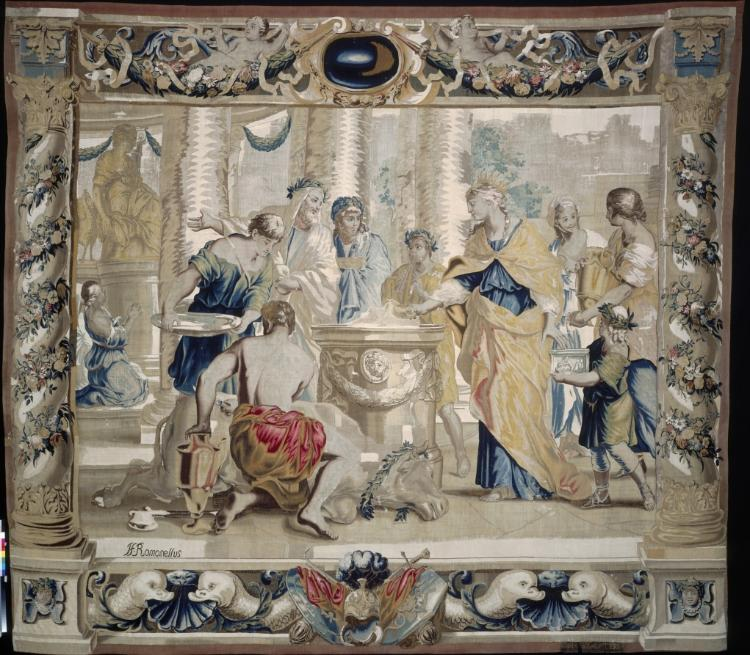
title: Dido Sacrifices to Juno, the Goddess of Marriage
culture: Belgium, 17th century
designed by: Giovanni Francesco Romanelli (Italian, 1610–1662)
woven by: Michael Wauters (Flemish, 1679)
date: 1679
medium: tapestry weave: silk and wool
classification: Tapestry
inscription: signed lower right: M. Wavters; signature lower left: J. F. Romanellus.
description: Dido loves Aeneas and offers a sacrifice to the gods, specifically Juno, the goddess of marriage, to keep him in Carthage. Priests prepare to cut open the newly slaughtered heifer and read the future in its entrails.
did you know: This tapestry is one from a series of eight that depicts the tragic love story of Dido and Aeneas. They were gifted to the museum for display in the armor court.